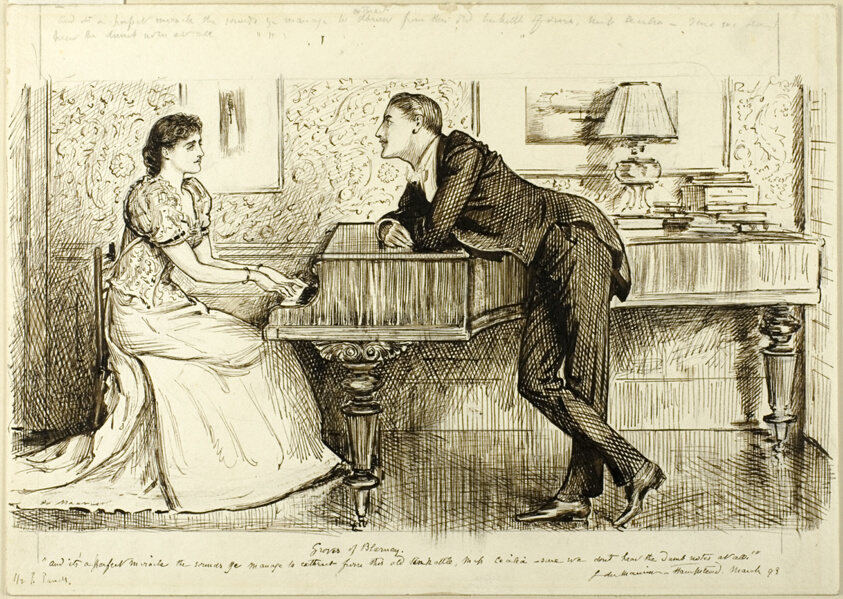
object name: Drawing and Watercolor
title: Groves of Blarney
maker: George Louis Pamella Busson Dumaurier; French, 1834-1896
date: 1893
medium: Pen and brown ink over graphite on ivory wove card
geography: France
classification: pen and ink drawings; drawings (visual works); prints and drawing